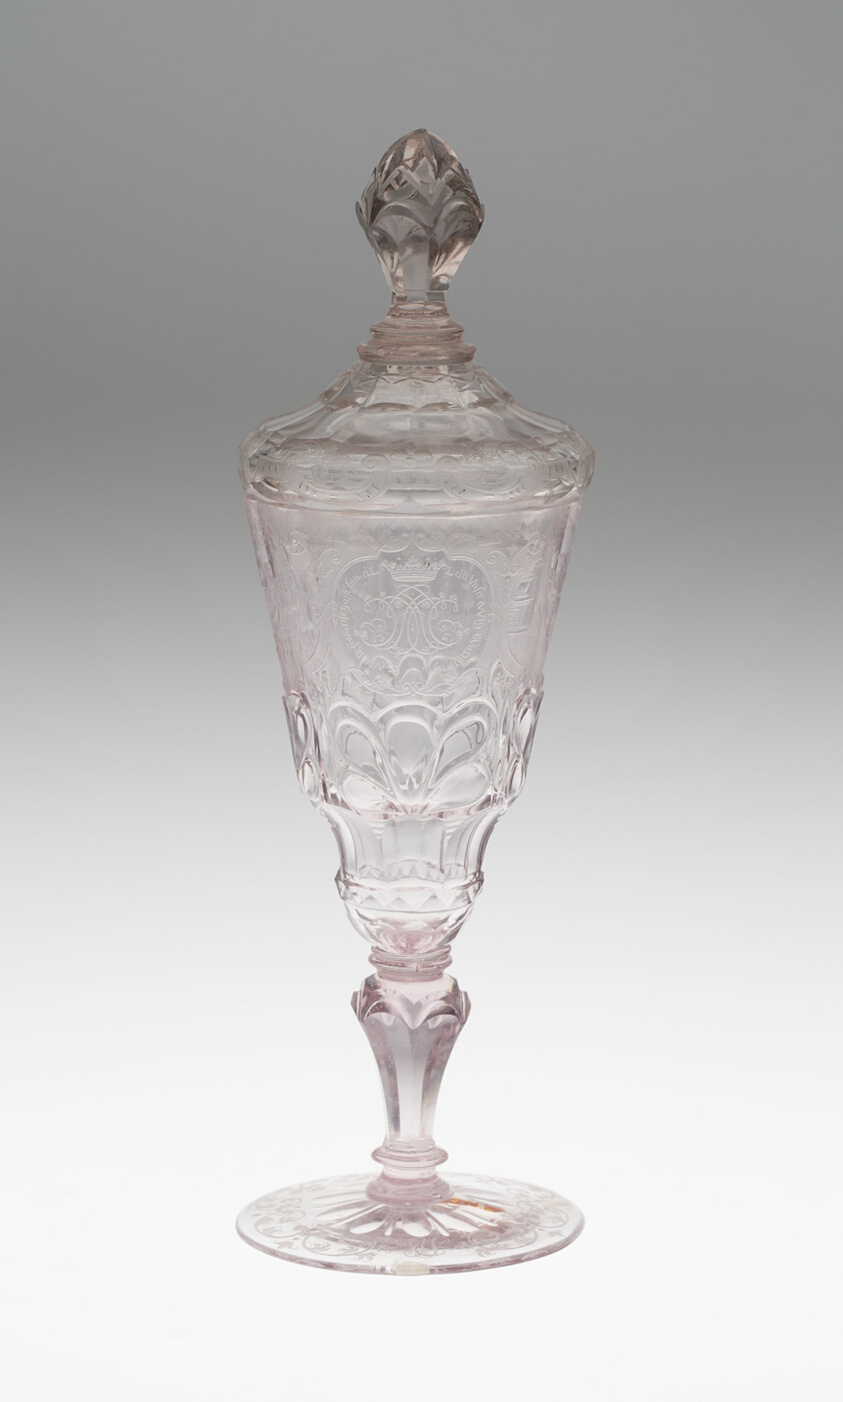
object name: Glass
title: Goblet with Cover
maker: Germany, Schleswig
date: c. 1738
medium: Glass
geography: Schleswig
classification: drinking vessel; glass; european decorative arts